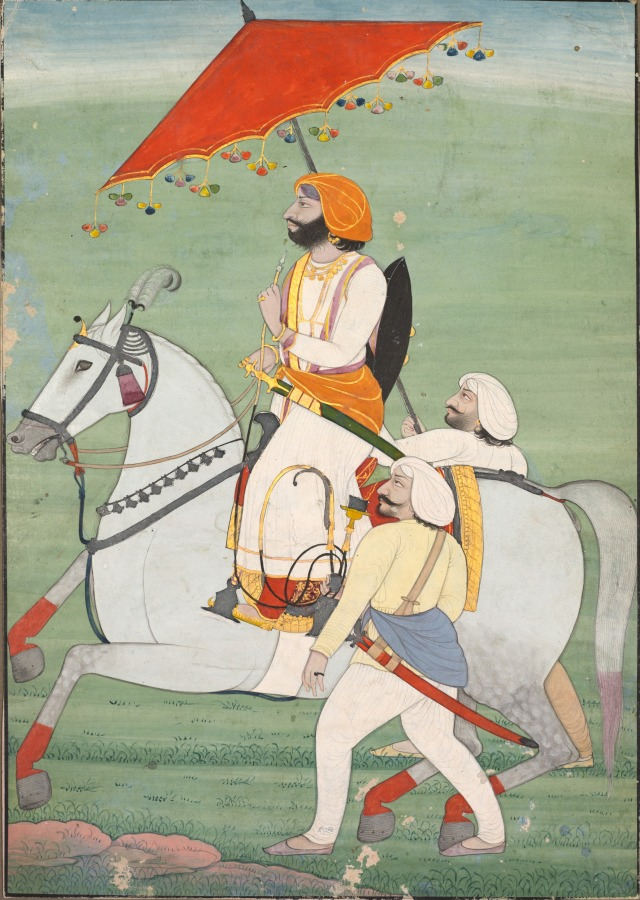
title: Raja Gulab Singh (1792–1857) of Jammu and Kashmir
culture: Northern India, Pahari kingdoms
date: c. 1830–40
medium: Gum tempera, gold, and silver on paper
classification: Painting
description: Maharaja Gulab Singh of the Hindu Dogra dynasty founded the princely state of Jammu and Kashmir in 1846. In this equestrian portrait, the umbrella is a sign of royalty, the sword and shield indicate his status as a warrior, and the hookah projects an image of noble refinement.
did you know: Ananda K. Coomaraswamy (1877–1947), who sold this painting to the CMA, was a curator of Indian art at the Museum of Fine Arts, Boston and a prolific author of art historical and philosophical works.